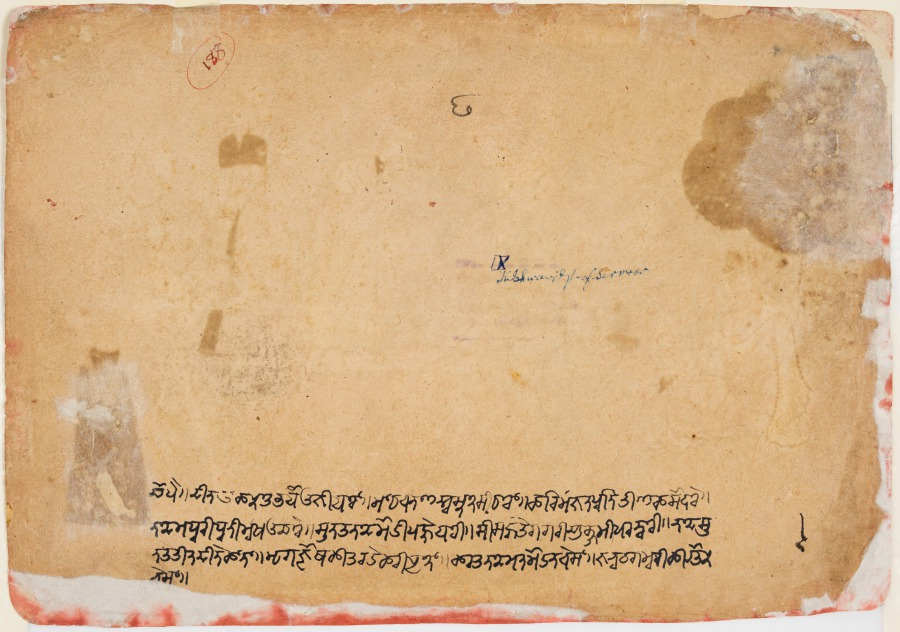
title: Madhava plays his vina before five women drawing water from a well, folio 3 from a Madhavanala-Kamakandala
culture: Northern India, Pahari kingdoms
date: c. 1720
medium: gum tempera and gold on paper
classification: Painting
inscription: Takri number: 3; four lines of Takri script; (in English) Roman numeral: X -K. Iswari Singh of Sirmur; number 188. caupai. calio kataka kāmavatī desā. dharati dhase bhāra sahe na sesā. jā dīna gayī to peyano kāī. dāsa kayi digapatī baraharaī. tarī kī khurī so kheī udāī. dharatī suraga eka ho jāī. jīha rājā ki sima jaī. le gaja danda milāī so āī. mādhavanala āge kar līā. jīhī eha prema pasarā kiyā. dohā. rājā bīkramaseṃna valī uhane sāna bajāe. kāmavatī ke nīkata īha nadī taṭa utari jvāe.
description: One morning, Madhava sits beneath a tree to play his vina (stringed instrument). At this hour, women come to a well to draw water. Time unfolds across the figures of the five women. Two pull their full water pots from the well. One stops abruptly, hearing his musical strains. Two have become so entranced that they drop and break their pots in surprise and listen with delight.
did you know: The vina is an Indian stringed instrument with gourd attached on each end as a resonator.